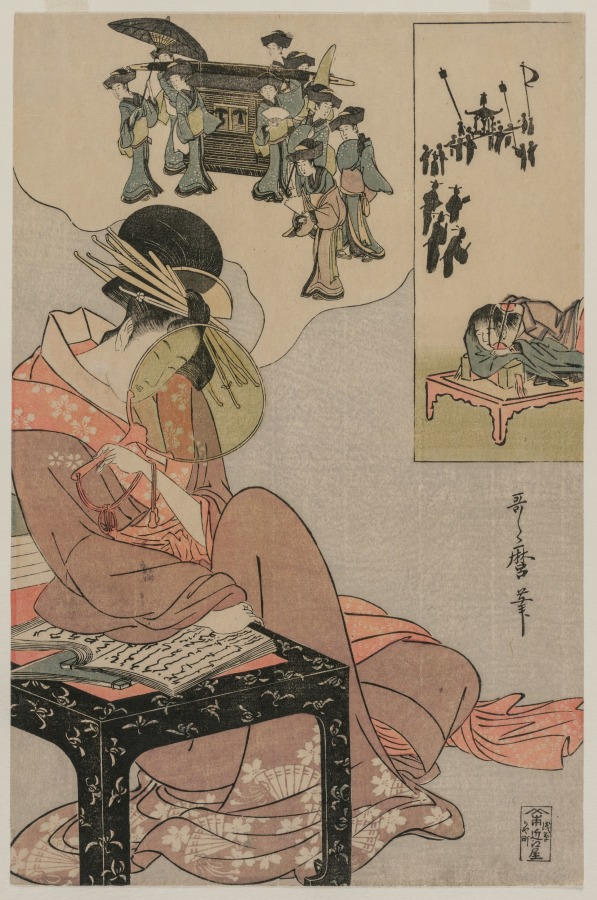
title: Courtesan Dreaming of a Marriage Procession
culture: Japan, Edo period (1615–1868)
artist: Kitagawa Utamaro (Japanese, c. 1754–1806)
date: late 1790s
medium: color woodblock print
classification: Print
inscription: Artist's signature: Utamaro hitsu.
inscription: Publisher: Ōmiya Gonkurō (Ōmiya, Asakusa Kayachō, emblem)